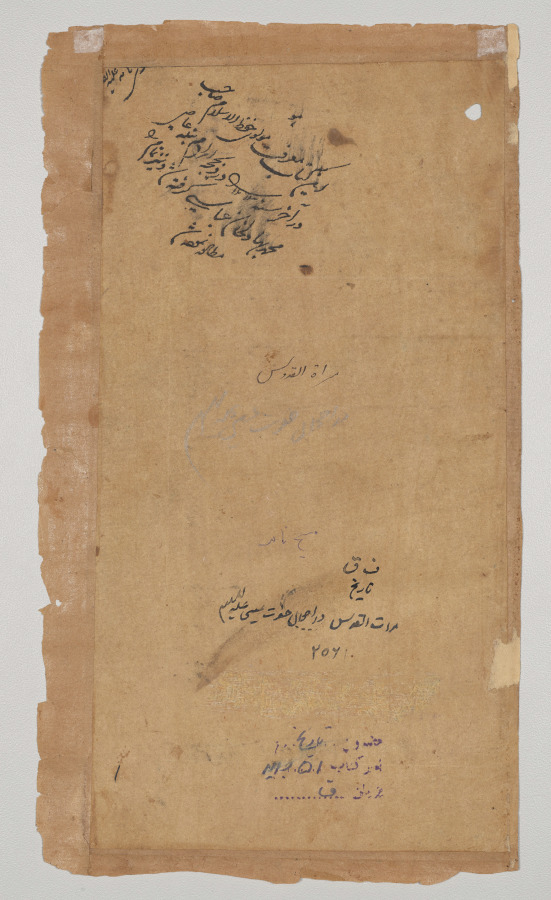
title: Text, Folio 1 (recto), from a Mirror of Holiness (Mir’at al-quds) of Father Jerome Xavier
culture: Mughal India, Allahabad, made for Prince Salim (1569–1627)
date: 1602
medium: Ink and gold on paper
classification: Manuscript